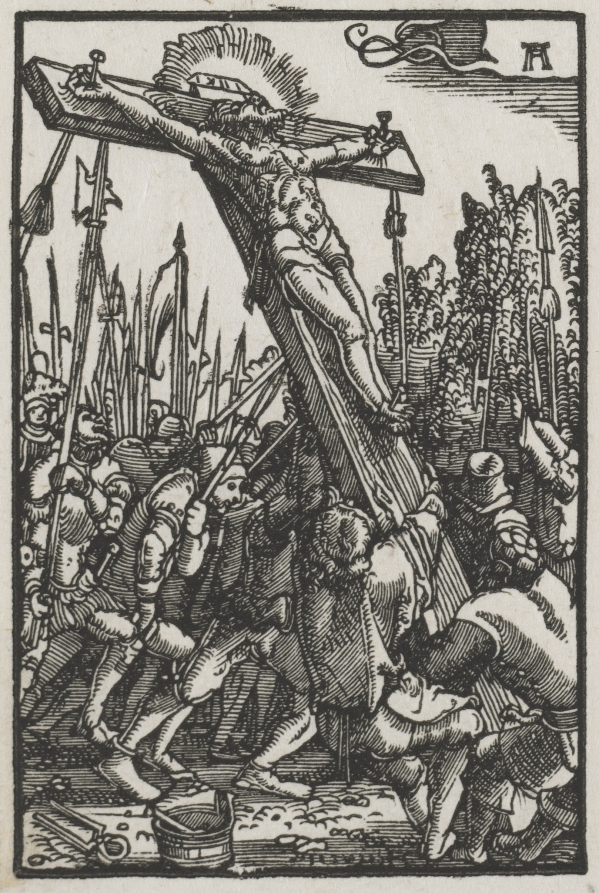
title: The Fall and Redemption of Man: The Raising of the Cross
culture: Germany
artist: Albrecht Altdorfer (German, c. 1480–1538)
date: c. 1515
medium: woodcut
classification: Print